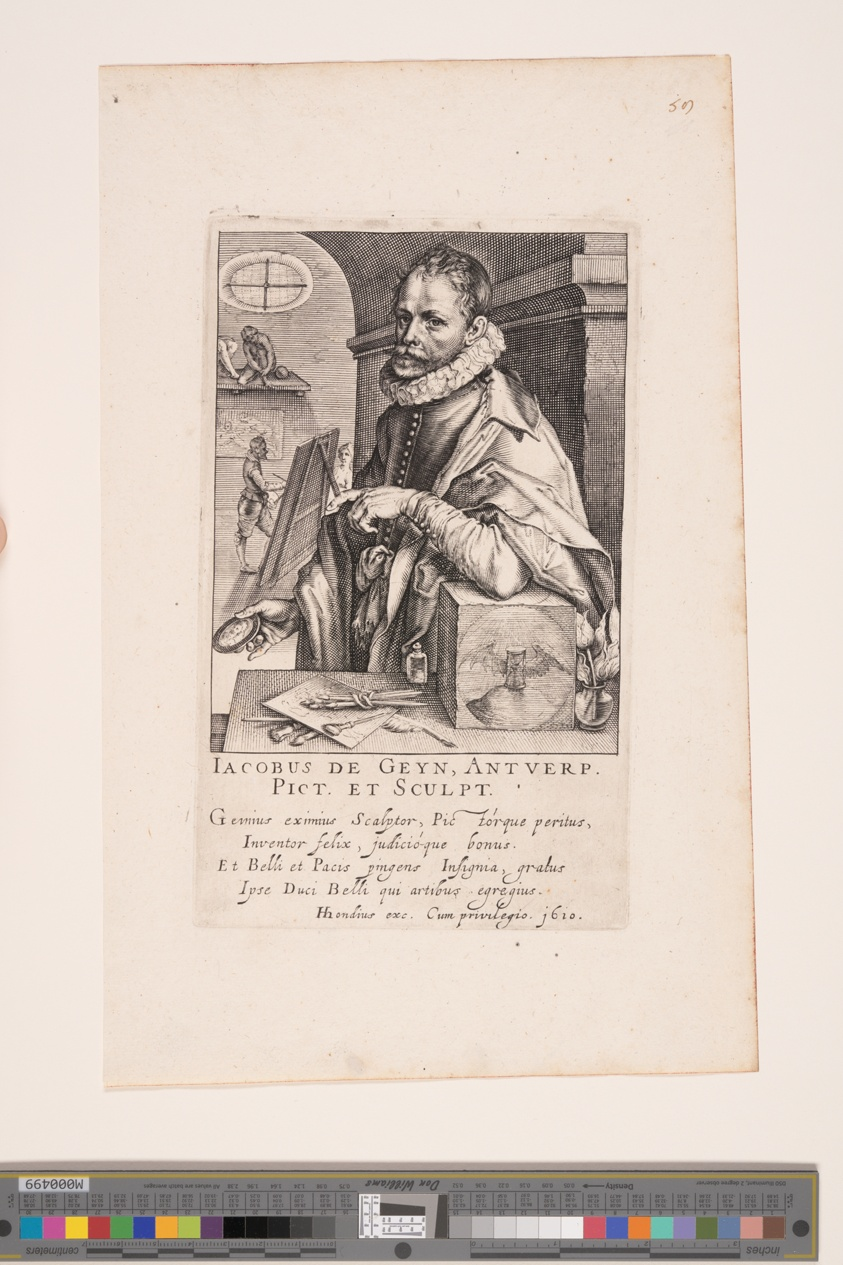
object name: Print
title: Jacob de Gheyn II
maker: Andries Jacobsz. Stock; Dutch, c. 1580–c. 1648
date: 1610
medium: Engraving on laid paper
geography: Netherlands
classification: engraving; paper; print; prints and drawing